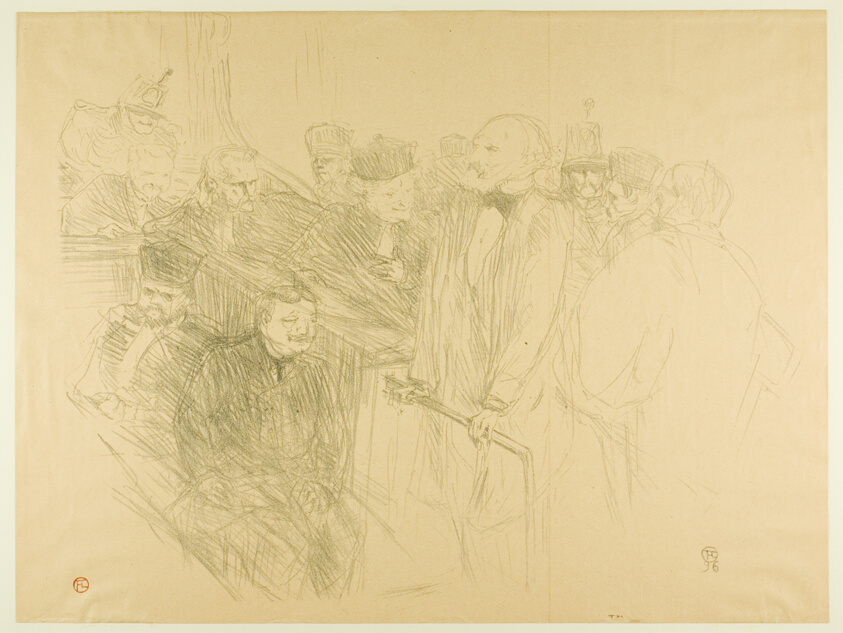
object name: Print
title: The Arton Trial, Ribot Giving Evidence (second plate)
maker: Henri de Toulouse-Lautrec (French, 1864-1901)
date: 1896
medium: Lithograph on tan wove paper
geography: France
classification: lithograph; print; prints and drawing